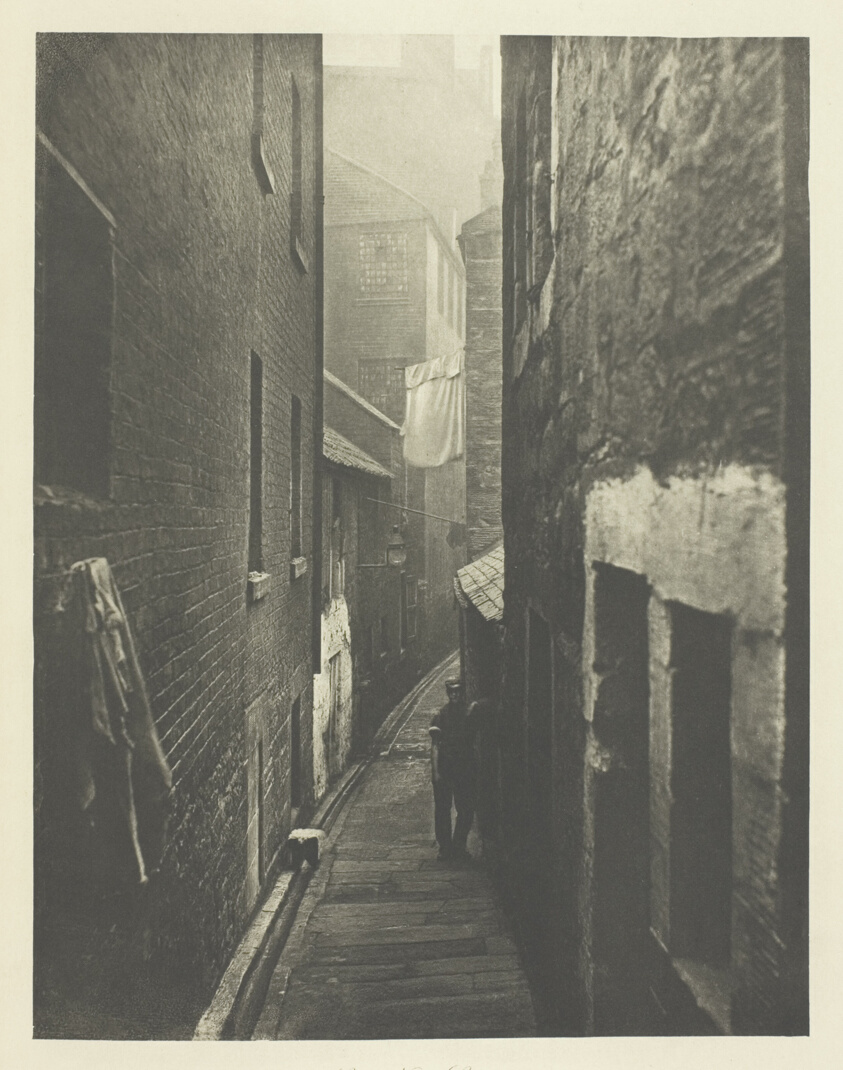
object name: Photograph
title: Close No. 31 Saltmarket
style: 19th century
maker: Thomas Annan (Scottish, 1829–1887)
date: 1868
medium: Photogravure, plate 26 from the book "The Old Closes & Streets of Glasgow" (1900)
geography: Scotland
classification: photograph; photography